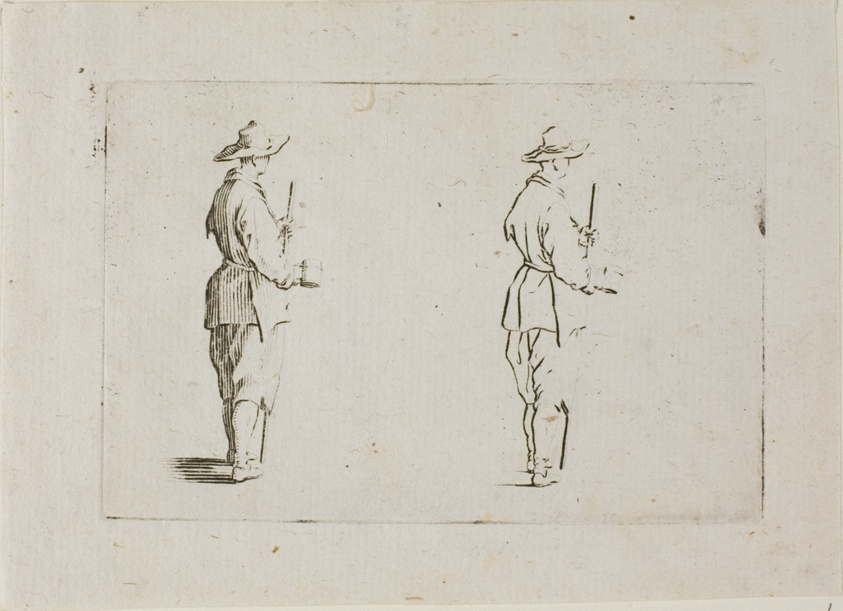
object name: Print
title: The Peasant Holding a Goblet, from The Caprices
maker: Jacques Callot (French, 1592-1635)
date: c. 1622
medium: Etching on ivory laid paper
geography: France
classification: etching; print; prints and drawing